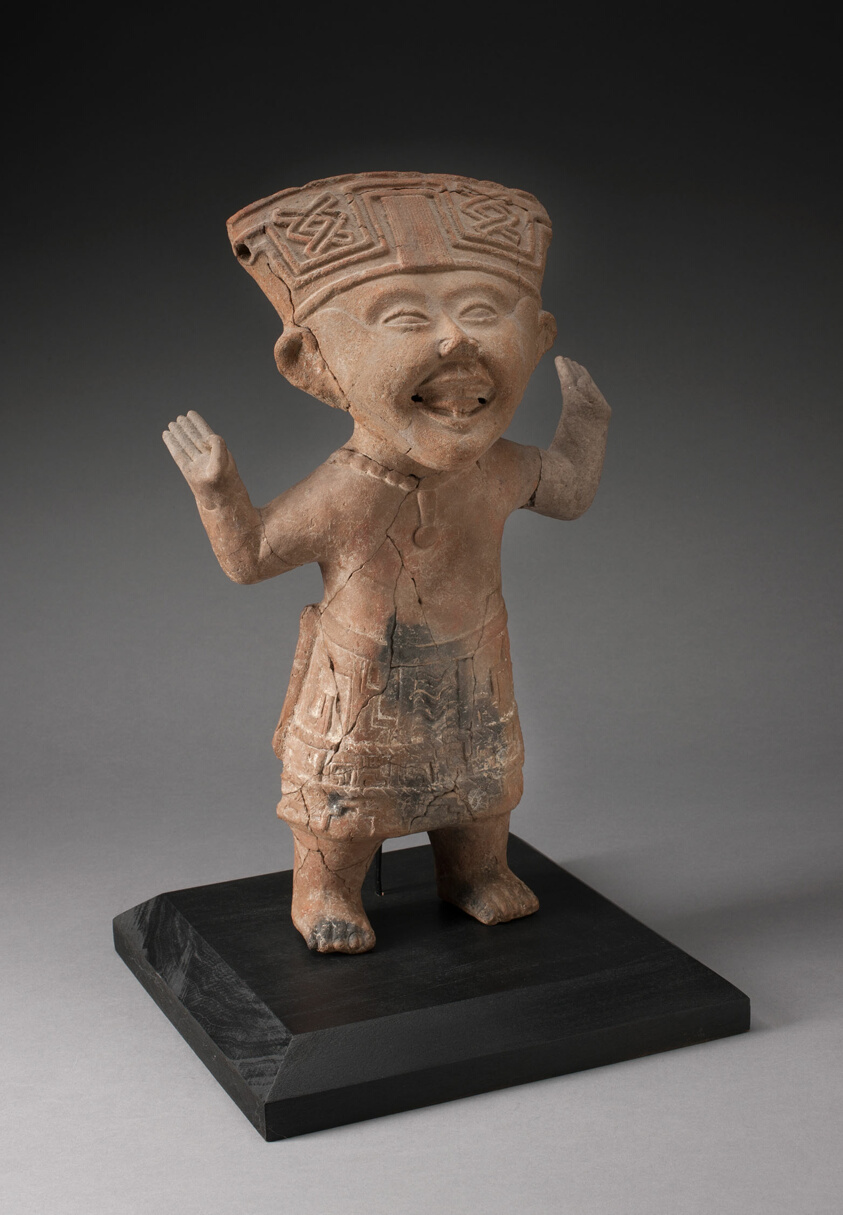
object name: Sculpture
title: Standing, "Smiling" Figure with Hands Raised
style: remojadas, Arts of the Americas, mesoamerican, veracruz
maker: Remojadas (Veracruz, south-central Gulf Coast, Mexico)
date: 600–900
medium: Ceramic and pigment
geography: Veracruz state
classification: sculpture; art of the americas; statue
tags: people